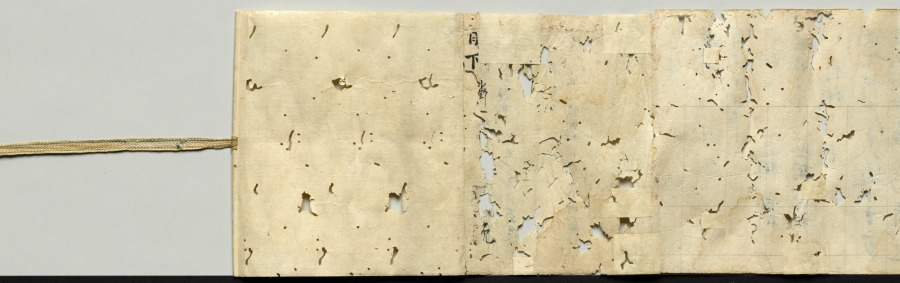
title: Scroll of Miscellaneous Notes written on a Calendar by Priest Seigen (verso)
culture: Japan, Kamakura period (1185–1333)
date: c. 1200–1231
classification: Manuscript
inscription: bears miscellaneous notes written by Priest Seigen.